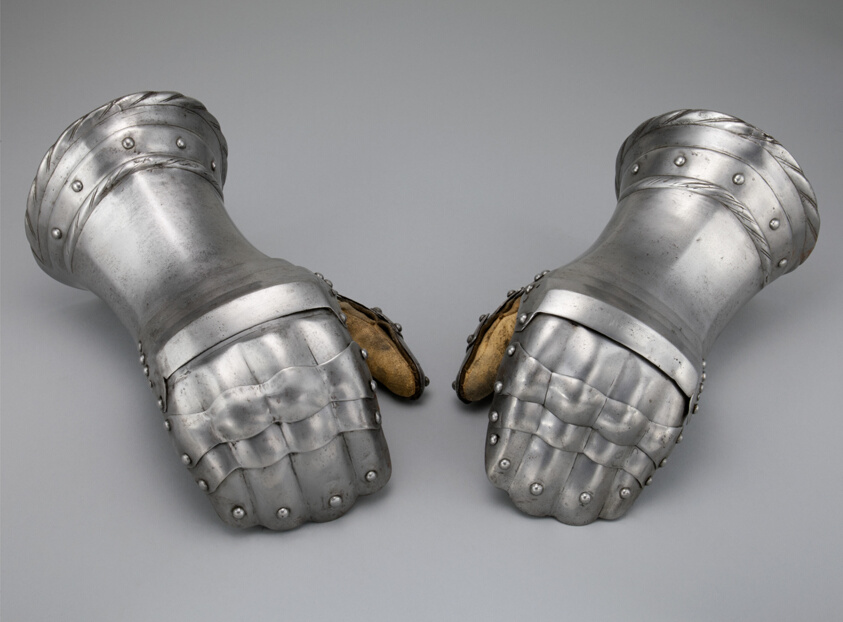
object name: Armor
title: Pair of Mitten Gauntlets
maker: Flemish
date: c. 1520 with modern restorations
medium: Steel and leather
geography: Flanders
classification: suit-gauntlet; armor; arms and armor